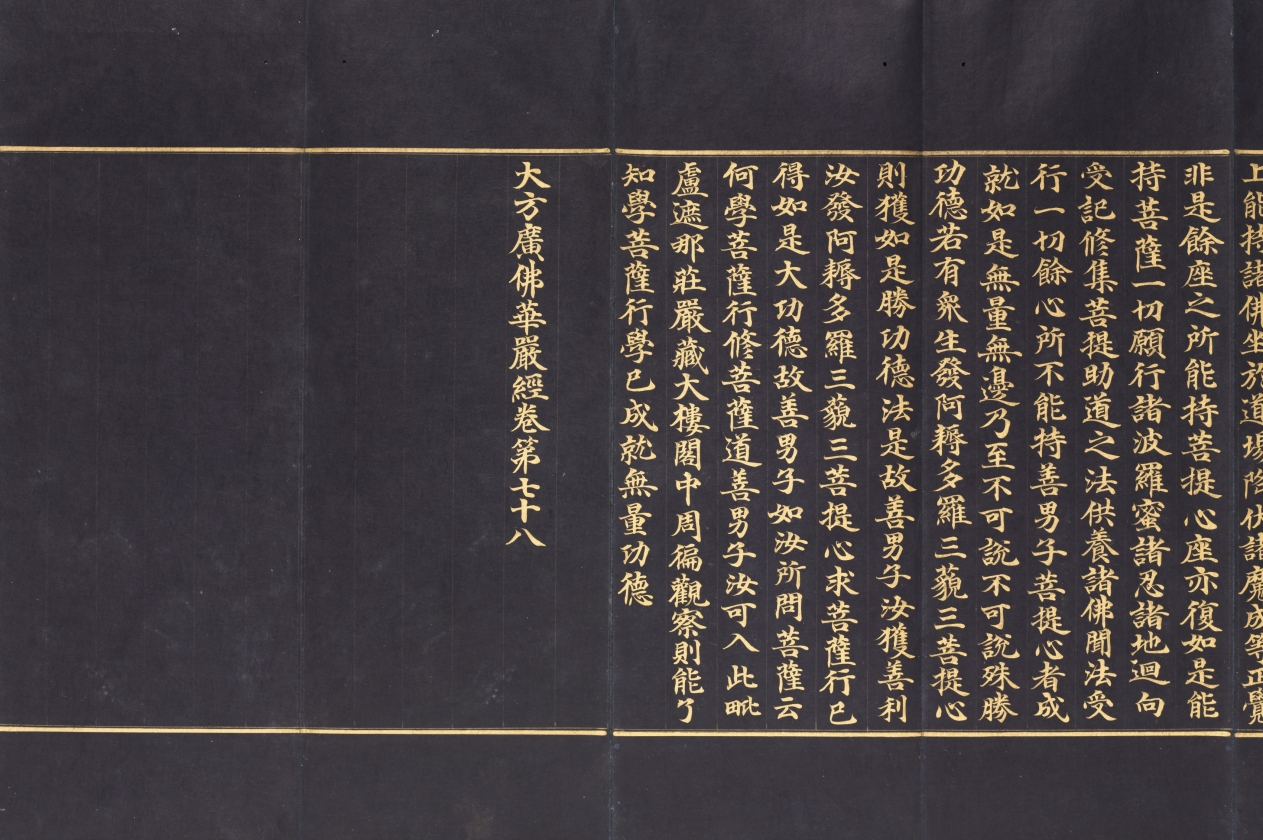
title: Avatamsaka Sutra No. 78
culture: Korea, Goryeo dynasty (918–1392)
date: 1300s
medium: Folded book with illustrated frontispiece; gold and silver on mulberry paper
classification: Bound Volume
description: This illuminated manuscript presents one part of the multivolume sacred text titled Avatamsaka (Flower Garland) sutra. Both the script and the image are rendered in gold ink on the smooth surface of the dark blue, indigo-dyed mulberry paper. This portion of the text, which reads from right to left, describes the encounter of the Buddha of the Future (Maitreya) and the young pilgrim Sudhana. The Buddha gives his words of wisdom to Sudhana, who asks questions about the path toward spiritual awakening. Mixed with ink and glue, the gold has a brilliance that strikingly reflects Sudhana’s ardent quest for understanding the way to reach enlightenment.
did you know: The pristine condition of this manuscript indicates that it was rarely used after its creation, revealing that the act of making a manuscript rather than reading it was the main religious goal.